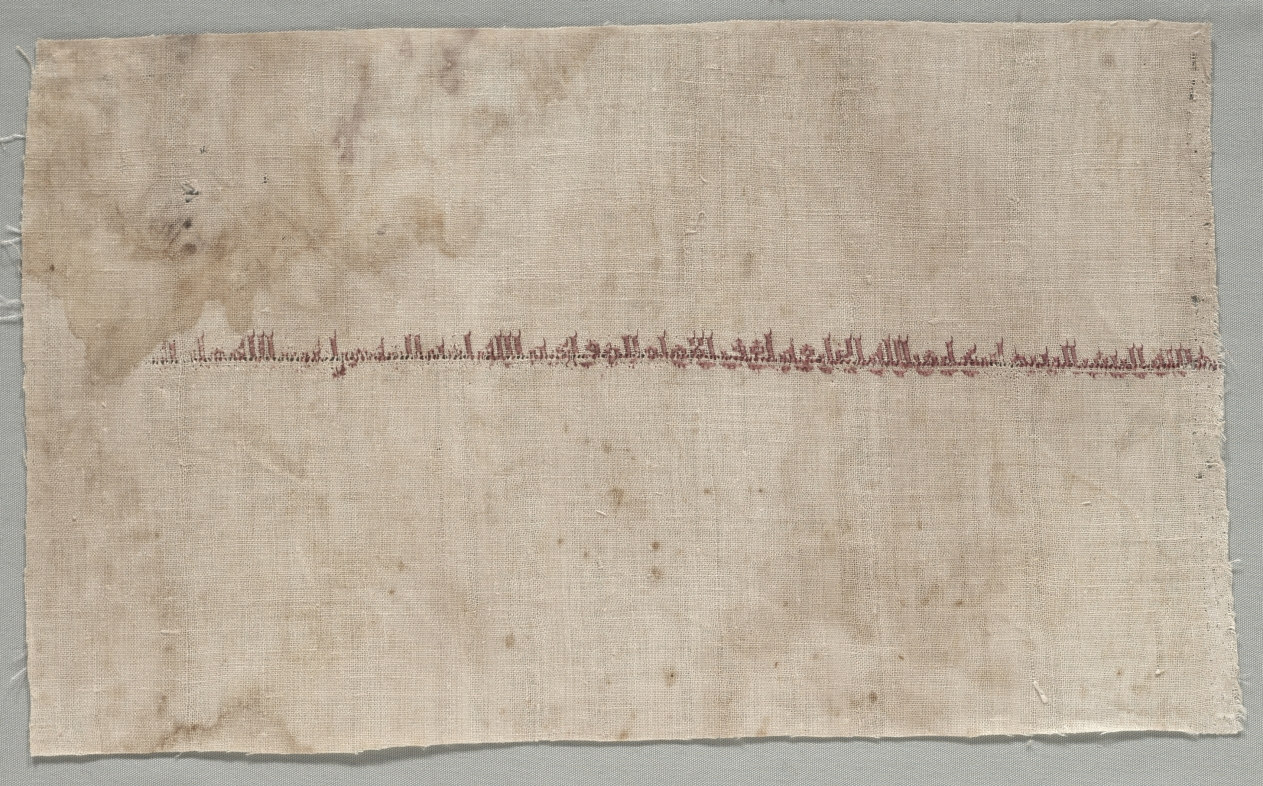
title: Fragment of a Tiraz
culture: Egypt, Second Abbasid period, Caliphate of al-Muqtadir, AH 295-320 (A.D. 908-932)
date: 908–32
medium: silk embroidery on linen tabby ground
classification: Textile